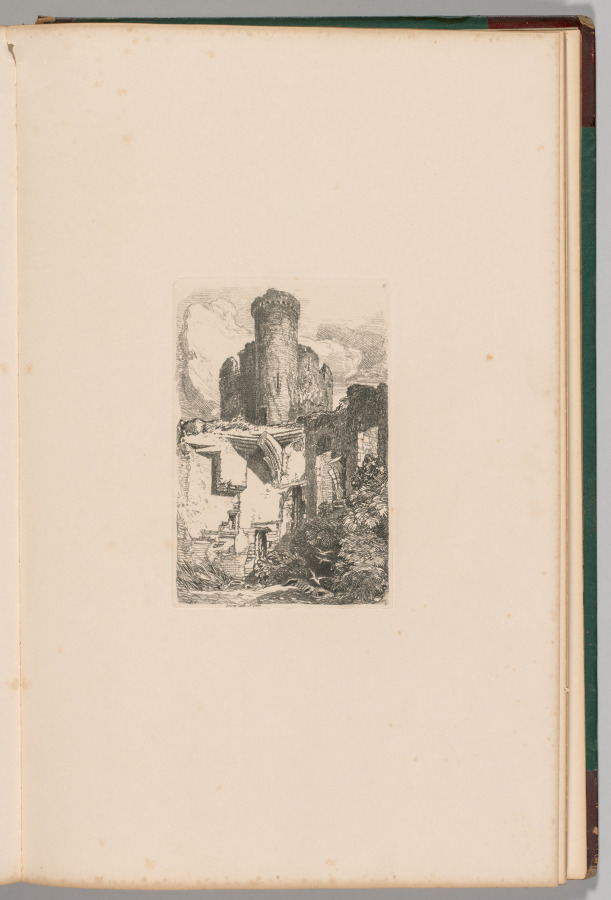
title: Liber Studiorum: Plate 31, Conway Castle, N. Wales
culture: England, 19th century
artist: John Sell Cotman (British, 1782–1842)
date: 1838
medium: softground etching, from a bound volume containing 48 plates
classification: Bound Volume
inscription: In plate, within image, upper right: 31; in plate, below image: Conway Castle, N Wales